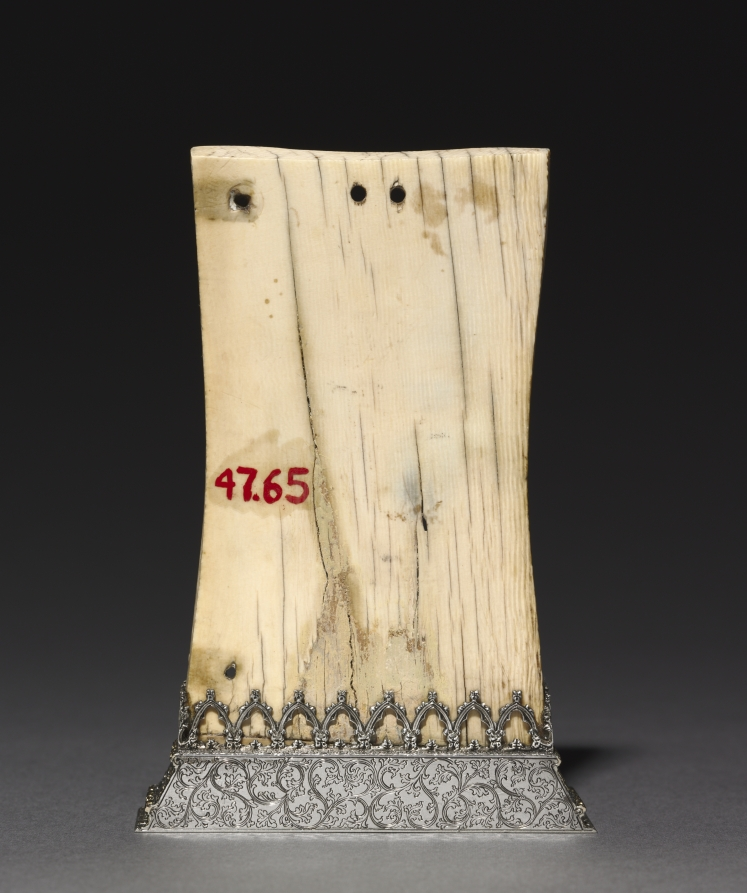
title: Plaque: The Crucifixion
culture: France or England, Gothic period, 14th century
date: c. 1345–1365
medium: ivory, mounted in a silver stand (after 1919)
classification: Ivory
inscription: engraved on bottom of later silver base: M. Buccellati, Milano, Roma, Firenza.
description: This plaque, once the right wing of a diptych (two-paneled carving), was slightly altered during its history by carving an arc into the sides, perhaps to force it into a frame. The silver base, added after 1919, is signed: "M. Bucellati, Milano, Roma, Firenze."